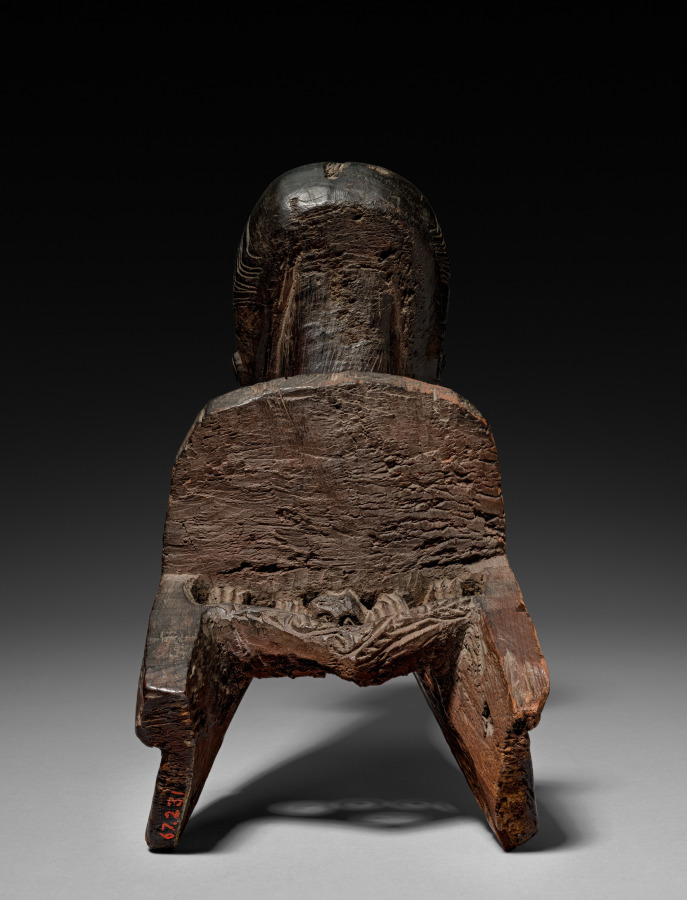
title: Fishing Canoe Prow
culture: Polynesia, New Zealand, Maori people, 19th century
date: 1800s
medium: wood with haliotis (pearl) shell inlay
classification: Sculpture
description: Intricate surface patterning characterizes Maori wood carvings. The swirls and spirals covering the face on this canoe prow replicate traditional facial tattoo patterns. Similar designs were used for post and gable figures that adorned both dwellings and compounds.